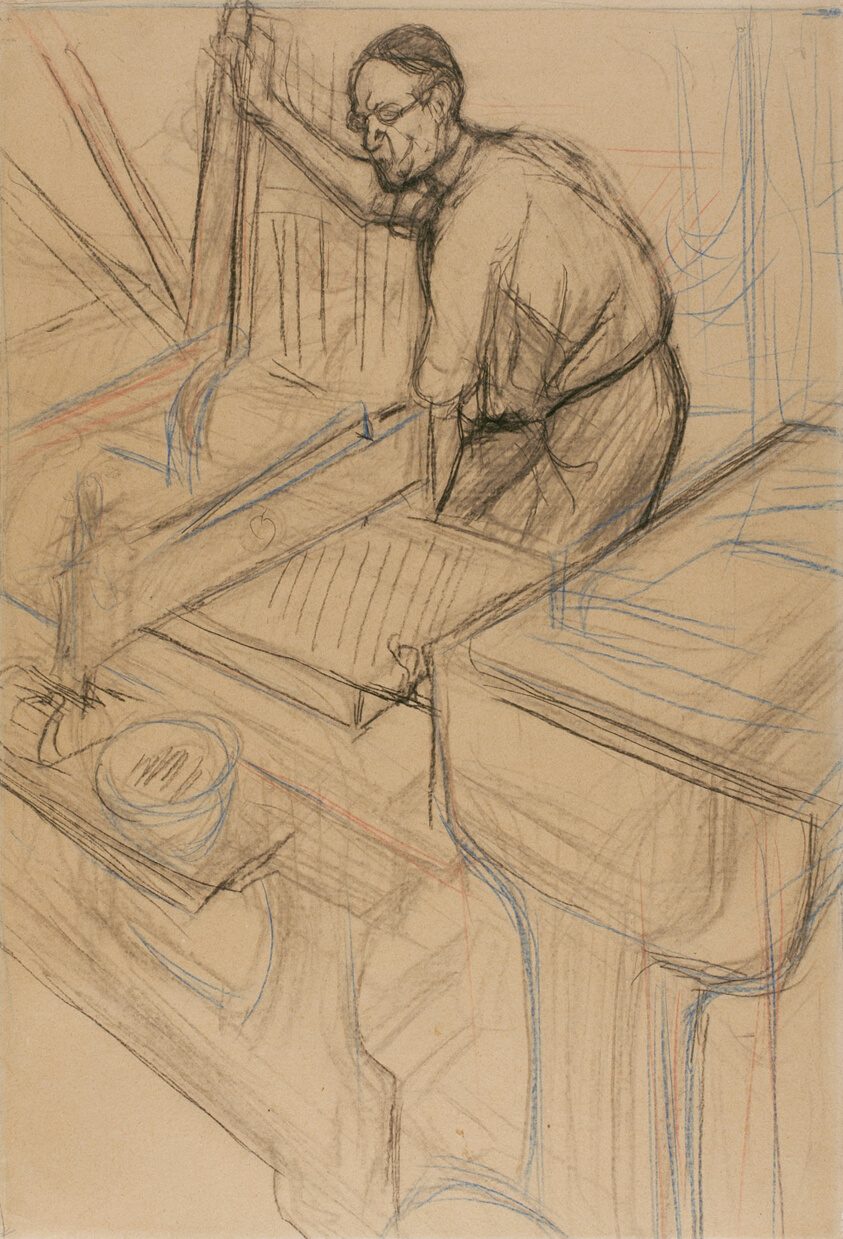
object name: Drawing and Watercolor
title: Study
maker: Henri de Toulouse-Lautrec (French, 1864-1901)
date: c. 1893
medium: Charcoal, with colored crayons, on tan wove paper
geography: France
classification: charcoal; drawings (visual works); prints and drawing